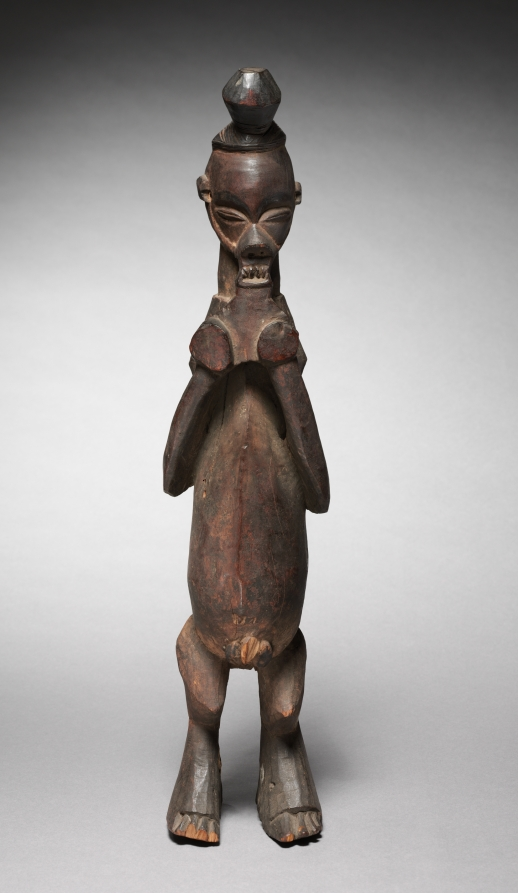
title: Male Figure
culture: Africa, Central Africa, Democratic Republic of the Congo, Yaka-style maker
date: 1900s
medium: wood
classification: Sculpture